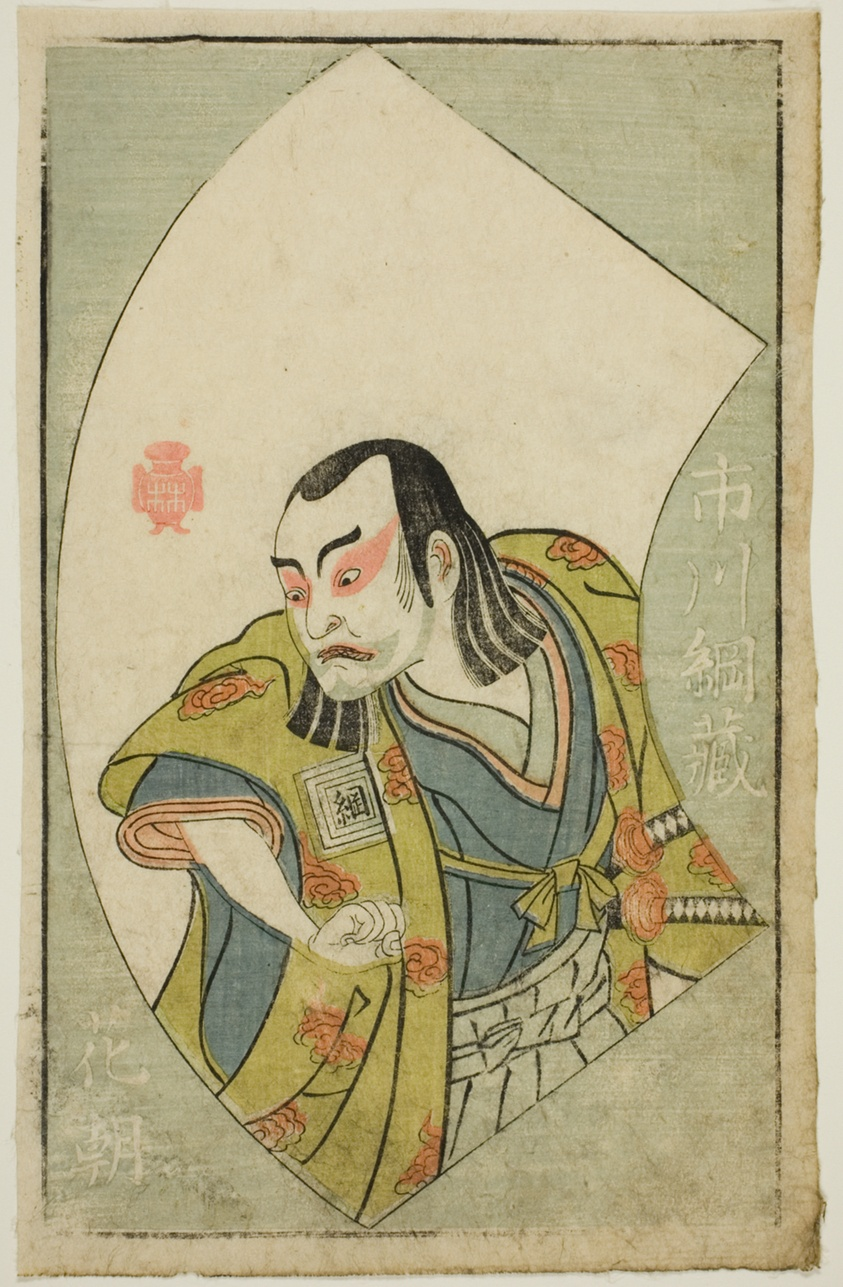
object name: Print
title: The Actor Ichikawa Tsunazo, from "A Picture Book of Stage Fans (Ehon butai ogi)"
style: Japanese (culture or style)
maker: Katsukawa Shunsho 勝川 春章; Japanese, 1726-1792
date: 1770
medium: Color woodblock print; page from illustrated book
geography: Japan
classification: woodblock print; print; asian art